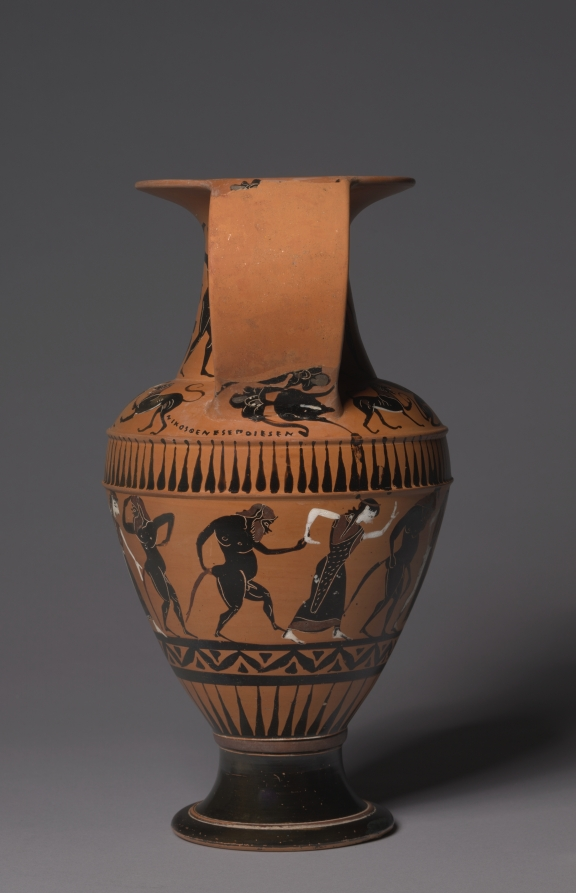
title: Black-Figure Nikosthenic Amphora (Storage Vessel): Dancing Youths; Sphinxes and Lions; Satyrs and Maenads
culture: Greek, Attic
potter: signed by Nikosthenes (Greek, Attic, active c. 545–510 BCE)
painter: attributed to Painter N, Thiasos Group (Greek, c. 530–510 BC)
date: c. 530–510 BCE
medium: ceramic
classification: Ceramic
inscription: inscription Under handle A/B:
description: The distinctive shape of this amphora—wide strap handles, conical neck, and ribs running around the upper body—is a trademark of the potter Nikosthenes, who signed his name below the partially restored handle (together with the verb EPOIESEN, for “made”). Nikosthenes signed nearly 150 surviving vases, more than any other named potter or vase-painter. Made in Athens with an Etruscan clientele in mind, Nikosthenic amphorae emulate precious metal and ceramic bucchero vases made in Etruria (central Italy), where many examples have been discovered. The painted figures include dancing youths (on the neck), sphinxes between lions (on the shoulder), and a continuous procession of dancing satyrs alternating with women (on the body).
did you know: The painter of this vase decorated nearly every available surface; the undecorated handle section is modern.